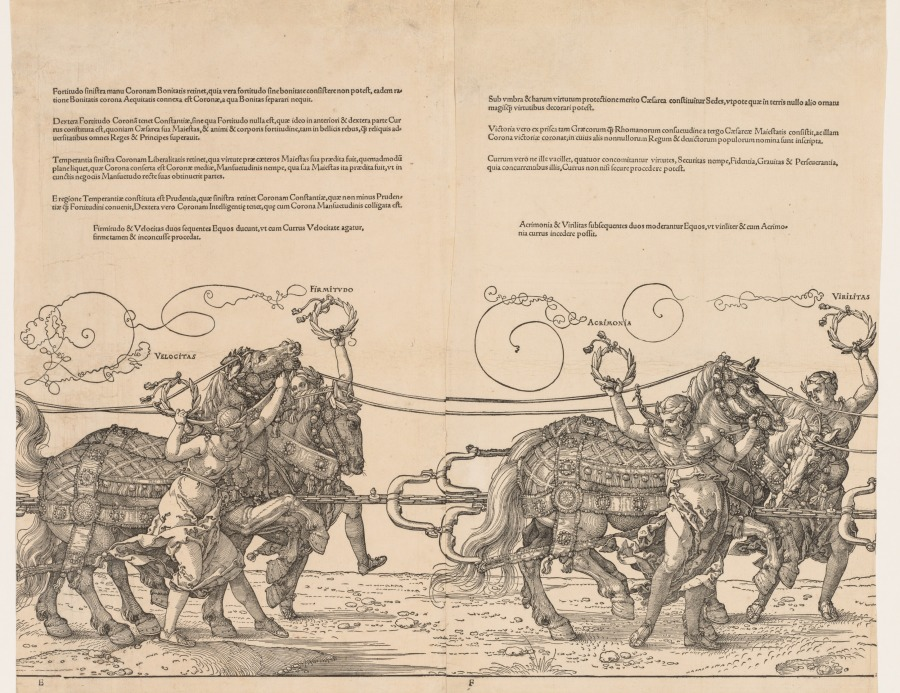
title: The Great Triumphal Car of Emperor Maximilian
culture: Germany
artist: Albrecht Dürer (German, 1471–1528)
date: 1523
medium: woodcut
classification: Print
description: Dürer conceived this fantastical chariot as part of a larger commission to depict Holy Roman Emperor Maximilian I (reigned 1486–1519) in a triumphal procession. The ruler sits enthroned in the lavish car, as Victory holds a laurel wreath above his imperial crown. Her feathered wings list Maximilian’s military campaigns. Nearly every component of the allegorical pageant—from the entourage of female attendants to the laurel garlands—has a Latin label describing honorable qualities of an ideal prince. The car rolls on wheels of Magnificence, Honor, Dignity, and Glory. Its driver is Reason, who guides a team of 12 horses with reins of Nobility and Power. Virtues of Justice, Strength, Wisdom, and Temperance, stand on pedestals arranged around the emperor. Maximilian died in 1519, before the ambitious commission could be completed. Dürer published The Great Triumphal Car at his own expense with text composed by his friend Willibald Pirckheimer (1470–1530).